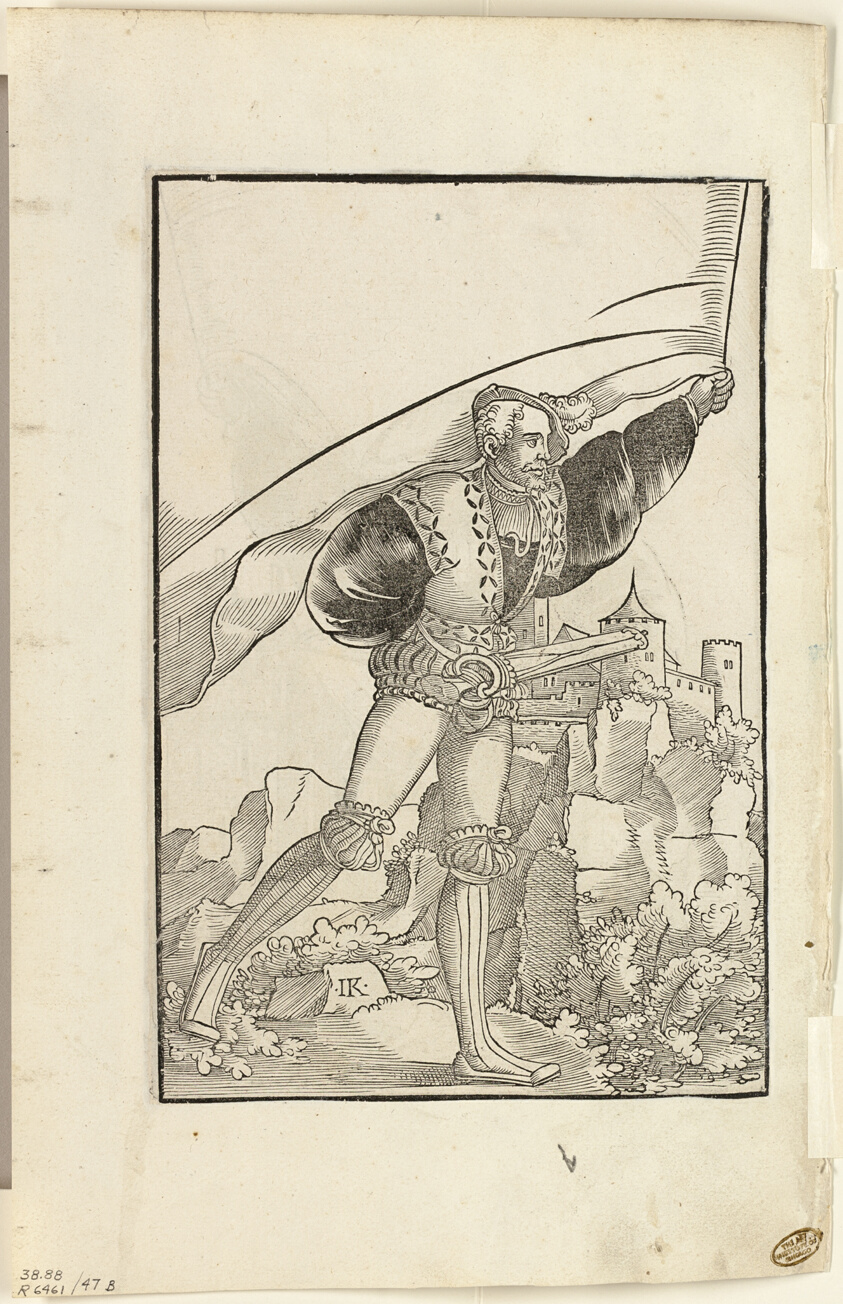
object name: Print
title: German Soldier Standing with Flag (recto) and German Soldier Marching with Flag (verso) from Wappen des heiligen römischen Reichs Teutscher Nation, plate 47 from Woodcuts from Books of the XVI Century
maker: Attributed to Monogrammist I.K. (German, active 1536-1545); assembled by Max Geisberg (Swiss, 1875-1943)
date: 1545, assembled into portfolio 1937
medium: Woodcut in black on cream laid paper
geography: Germany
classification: woodcut; print; prints and drawing